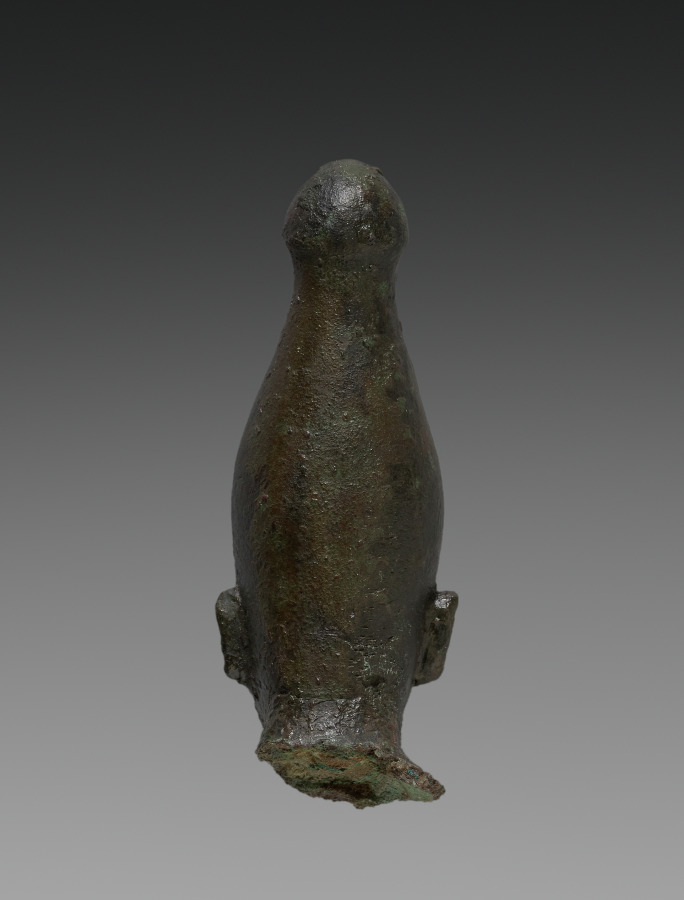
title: Statuette of Osiris (head)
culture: Egypt, Late period (715–332 BCE), Dynasty 26 or later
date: 664–525 BCE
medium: black copper (?), hollow cast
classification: Sculpture